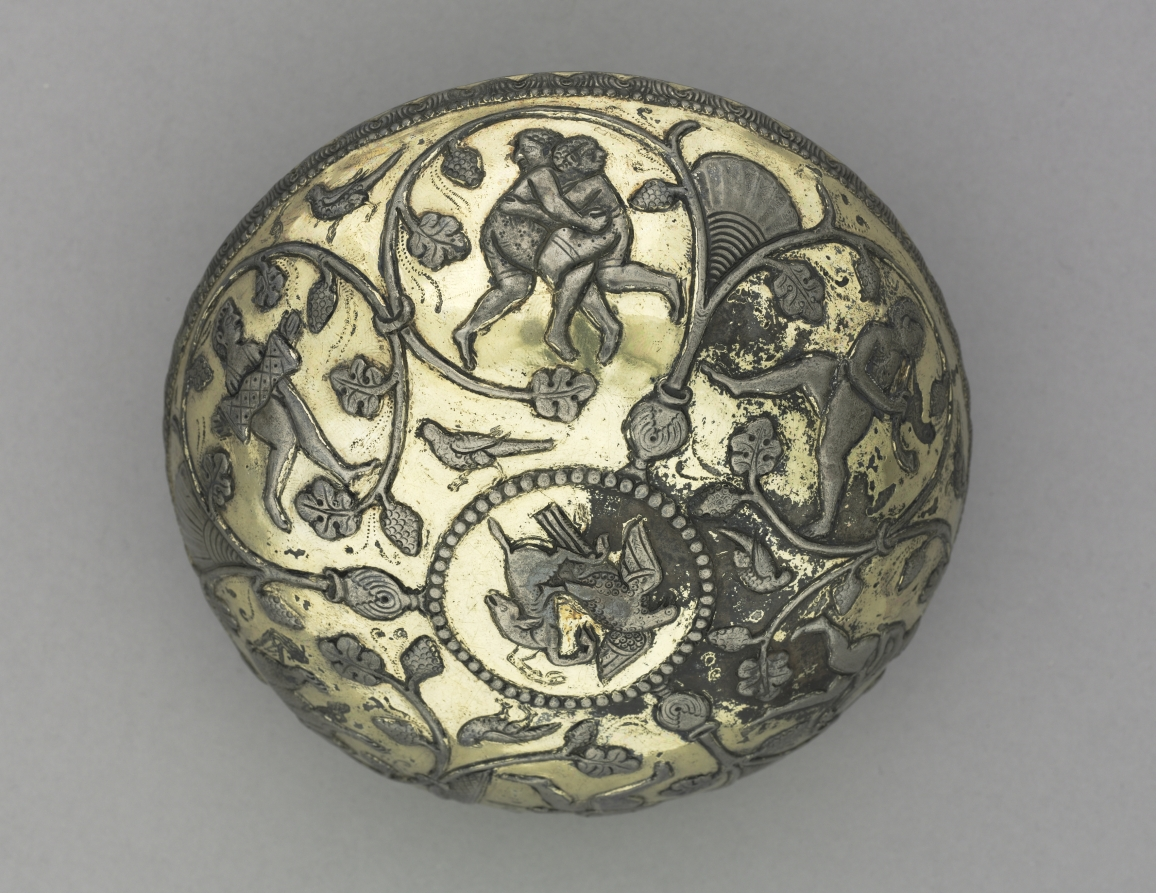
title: Bowl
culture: Iran, Sasanian Empire (224–651 CE)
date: 500–700 CE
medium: silver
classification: Metalwork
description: Every good Zoroastrian was supposed to spend one-third of his day farming; one-third philosophizing; and one-third eating, resting, and at pleasure. The abundance of Sasanian luxury goods is evidence of the importance accorded the last third of the day.